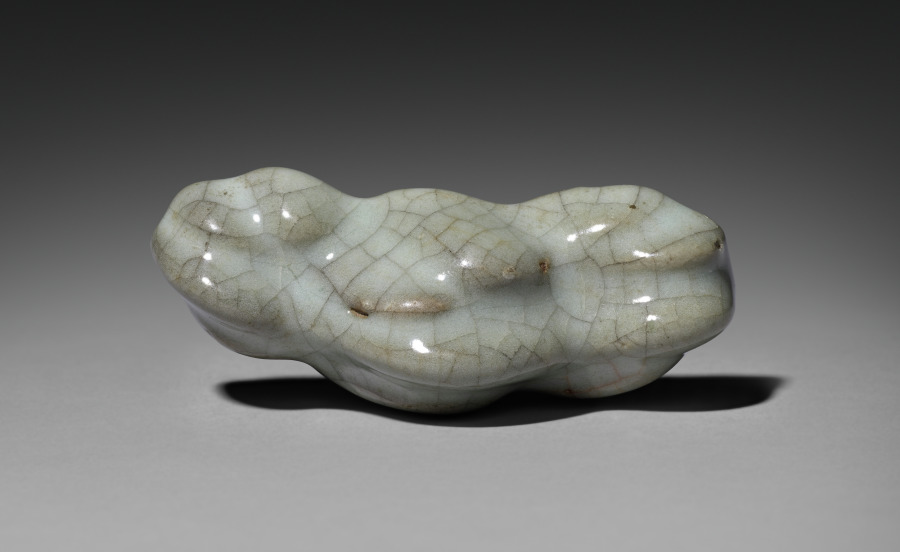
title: Brush Rest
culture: Southeast China, Zhejiang province, Southern Song dynasty (1127–1279)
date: 1127–1279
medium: glazed stoneware, Guan ware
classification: Ceramic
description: This brush rest, shaped like a mountain range, is covered with a thick and soft gray-blue crackled Guan ware glaze that pools in the deeper areas, giving the mountain range a hazy appearance as if enshrouded in white mists. Guan ware was produced in the imperial kilns in Hangzhou, the Southern Song dynasty capital.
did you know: There are twelve "hills" on this mountain-shaped brush rest.